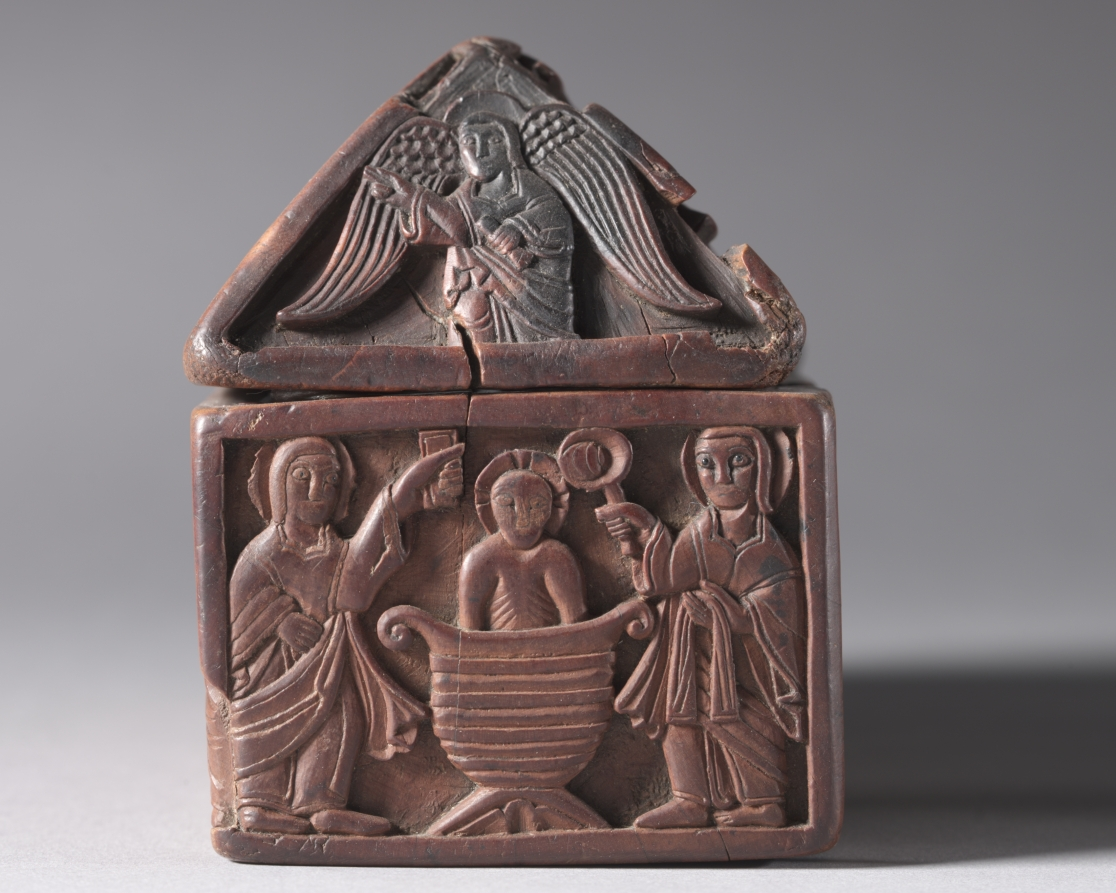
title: Wooden Casket: Scenes from the Life of Christ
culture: Anglo-Saxon, England, West Midlands?, Romanesque period, 11th century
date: c. 1050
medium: boxwood, copper-alloy, glass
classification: Furniture and woodwork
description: This casket is a rare, if not unique example of high-quality woodcarving from Anglo-Saxon England. Decorated with scenes from Christ’s life, it was likely made for an ecclesiastical purpose and may have housed relics. On one long side, the Christ child rests in the manger. Above, the Crucifixion is shown with mourners gathered below the cross and two angels flanking it on either side. On the other long side is the Ascension, God’s hand pulling Christ heavenward. Christ in Majesty appears above. The short sides show Christ’s baptism and his entry into Jerusalem.